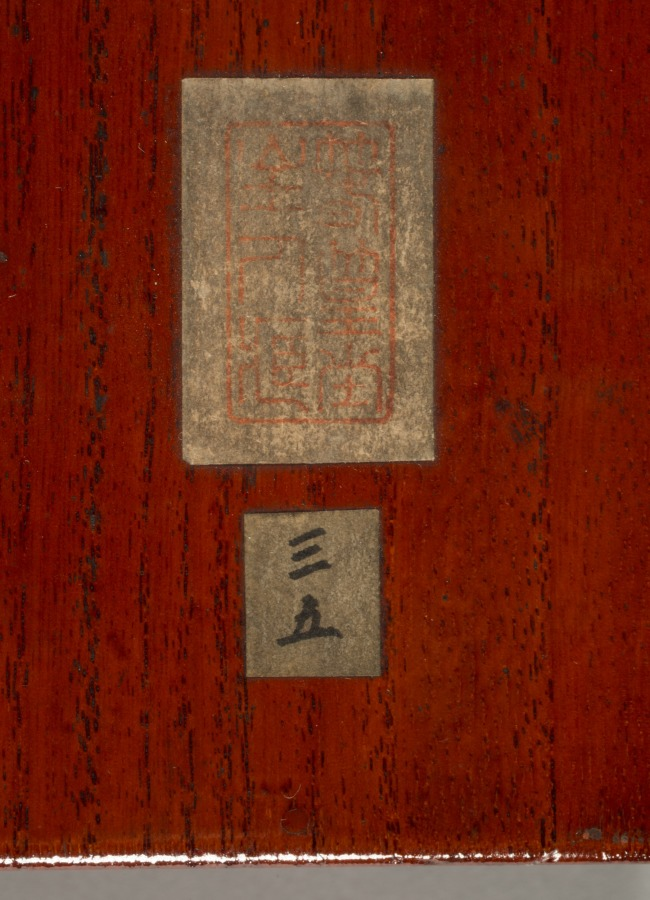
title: Monju as a Child (Chigo Monju)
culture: Japan, Muromachi period (1392–1573)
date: early 1400s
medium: hanging scroll; ink, color, and gold on silk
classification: Painting